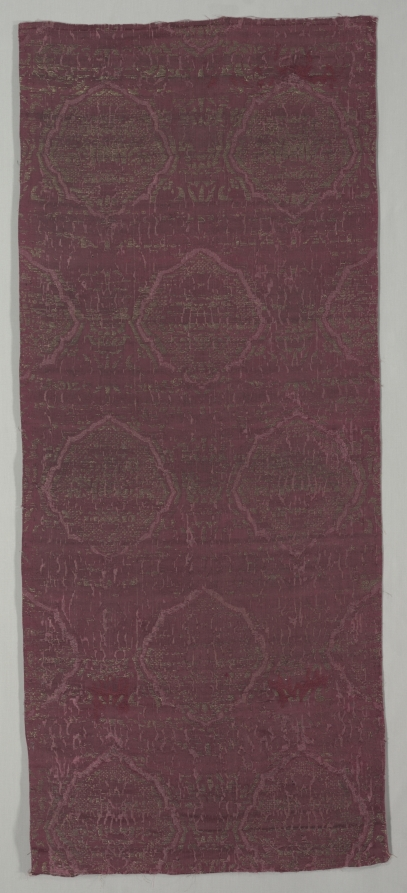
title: Textile Fragment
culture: Italy, 16th century (probably)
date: 1500s (probably)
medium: plain compound satin; silk and metal thread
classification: Textile